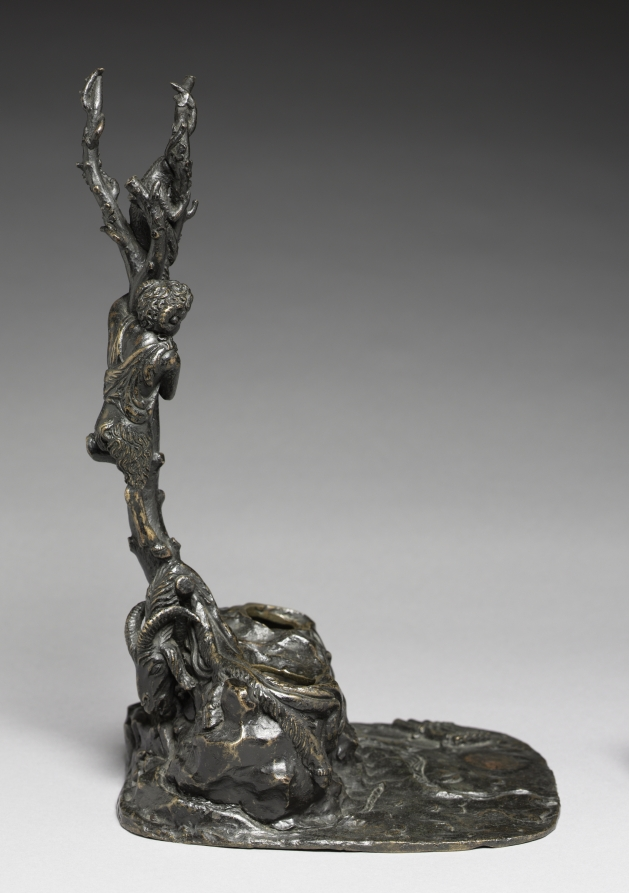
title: Base for a Satyr and Satyress Group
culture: Italy, possibly Padua, early 16th century or later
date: early 1500s or later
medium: bronze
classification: Sculpture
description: The pagan subject matter here was common in the 1500s and, with the pan pipes on the ground, indicates a scene of poetry and music. Long thought to be an ink stand, the two openings are now understood as possibly having housed a satyr and satyress.